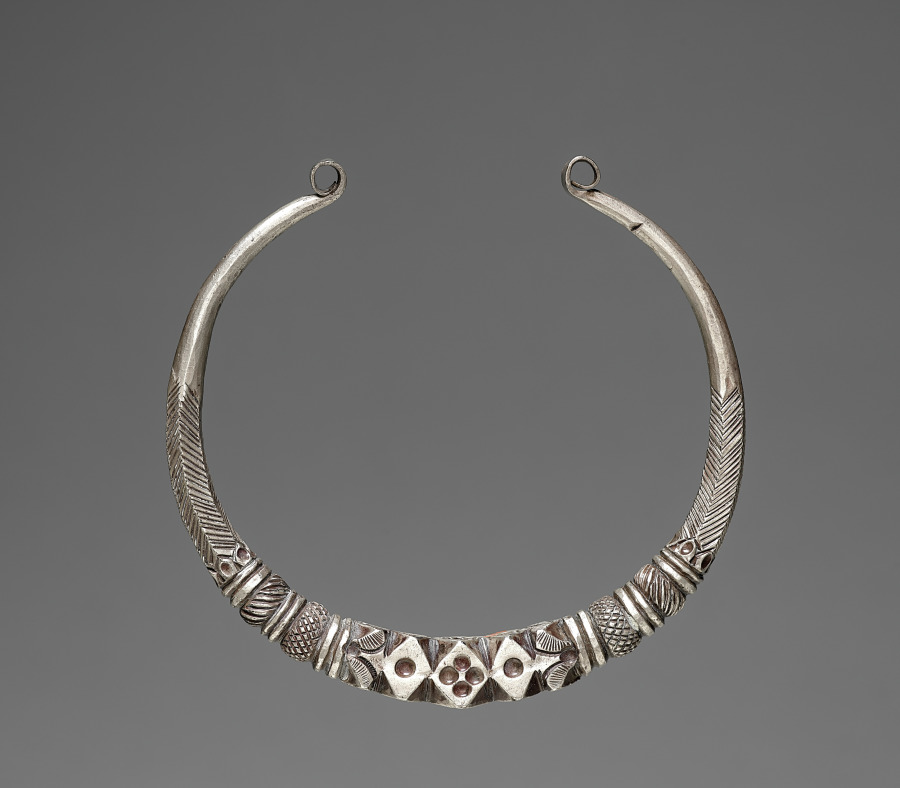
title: Neckpiece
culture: India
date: 1800s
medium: silver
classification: Jewelry